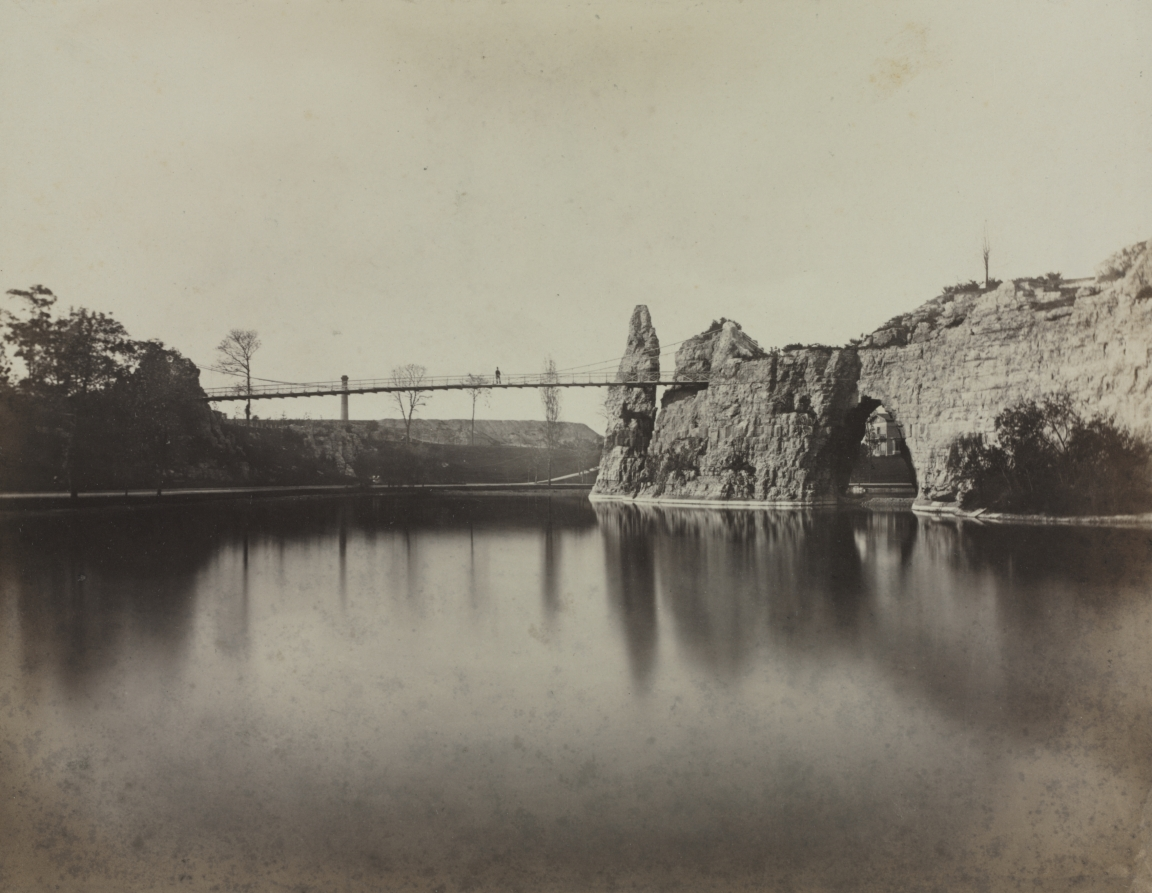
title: Buttes Chaumont, Paris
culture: France, 19th century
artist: Charles Soulier (French, 1840–1875)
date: c. 1860s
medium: albumen print from wet collodion negative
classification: Photograph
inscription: Written in pencil on recto of photo: "253"; on recto of mount: "F1091"; "Buttes Chaumont"